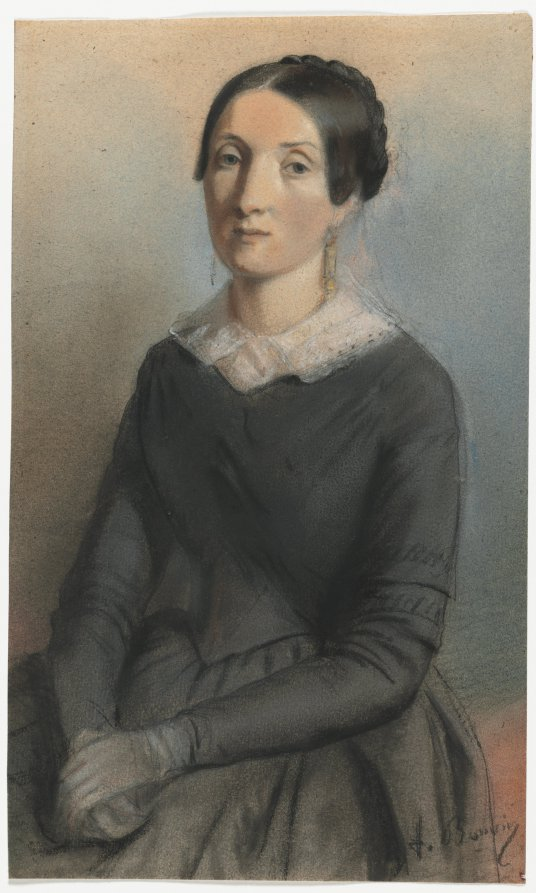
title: Portrait of a Woman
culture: France, 19th century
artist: François Bonvin (French, 1817–1887)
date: c. 1843–81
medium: pastel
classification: Drawing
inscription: Signed, lower right in black chalk: F. Bonvin